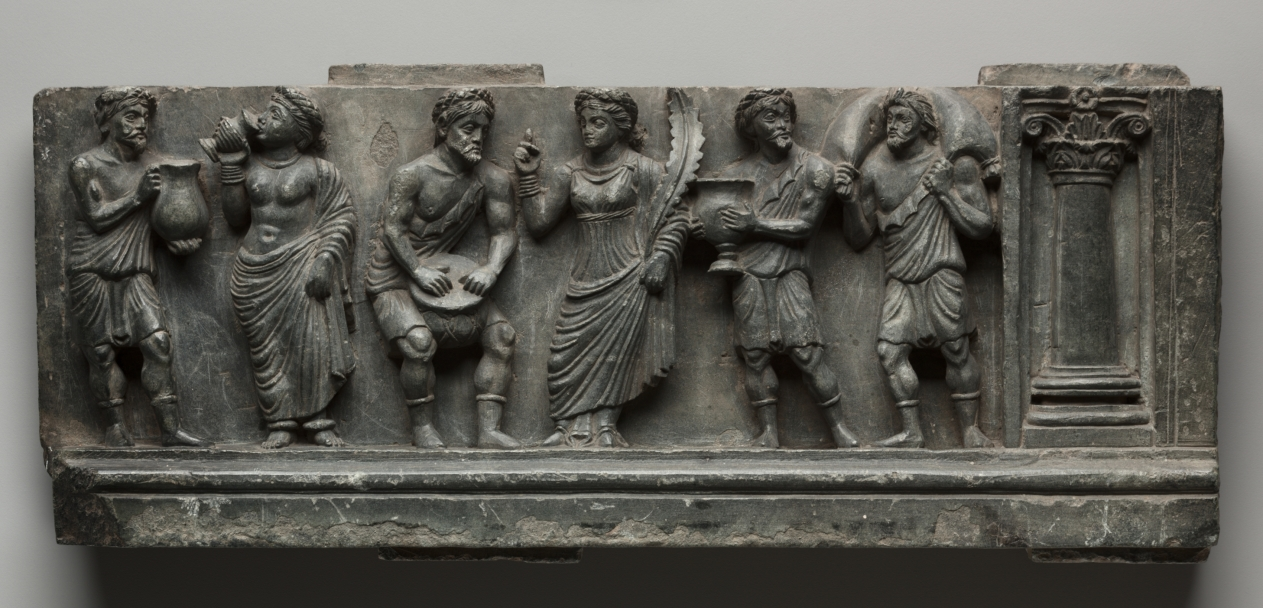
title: Bacchanalian Scene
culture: Pakistan, Gandhara, Buner area, early Kushan period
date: 1–100 CE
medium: schist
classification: Sculpture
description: The pleated garments and crowns of laurels suggest that these six figures were intended to appear like Greco-Roman people from the Mediterranean world. The male figure at the far right carries a skin, presumably full of wine, next to another bearded man holding a large footed vessel. A woman with a palm leaf on her arm—a sign of victory—gestures suggestively toward a man playing a drum. At the far left a figure drinks wine from a cup that the man at the far left may have just filled from his pitcher.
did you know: Silver striated vessels that were used as reliquaries are similar to the cup from which the second figure from the left drinks.